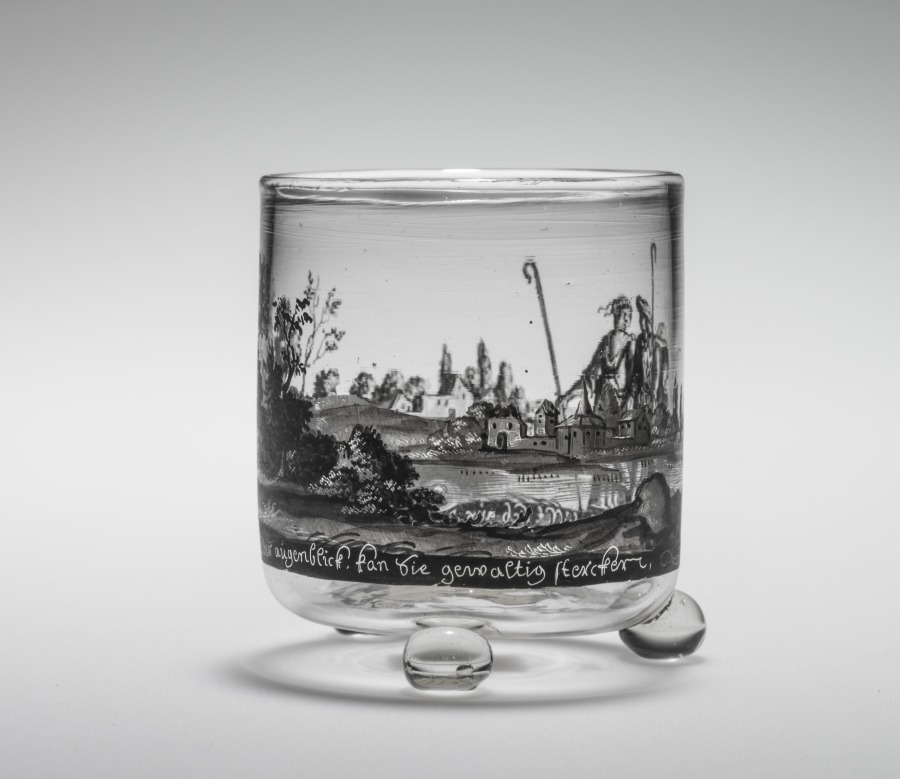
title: Tumbler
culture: Germany, Nuremberg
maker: attributed to Johann Schaper (German, 1635–1670)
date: 1670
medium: glass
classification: Glass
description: Johann Schaper (1621-1670) was a German painter of stained glass, mainly working in Nuremberg and Regensberg, who later turned to decorating glass and ceramics from his home, typical of artisans in the 17th century (hausmaler). His style was mainly a linear one in the manner of engravings, and often he worked in black (schwarzlot) or dark colors. Schaper was so influential that other artisans tried to copy his technique, in which he scratched out details with a needle, with varying degrees of success.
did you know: The fine details of the decoration on this tumbler were achieved by scratching away the enamel with a needle.